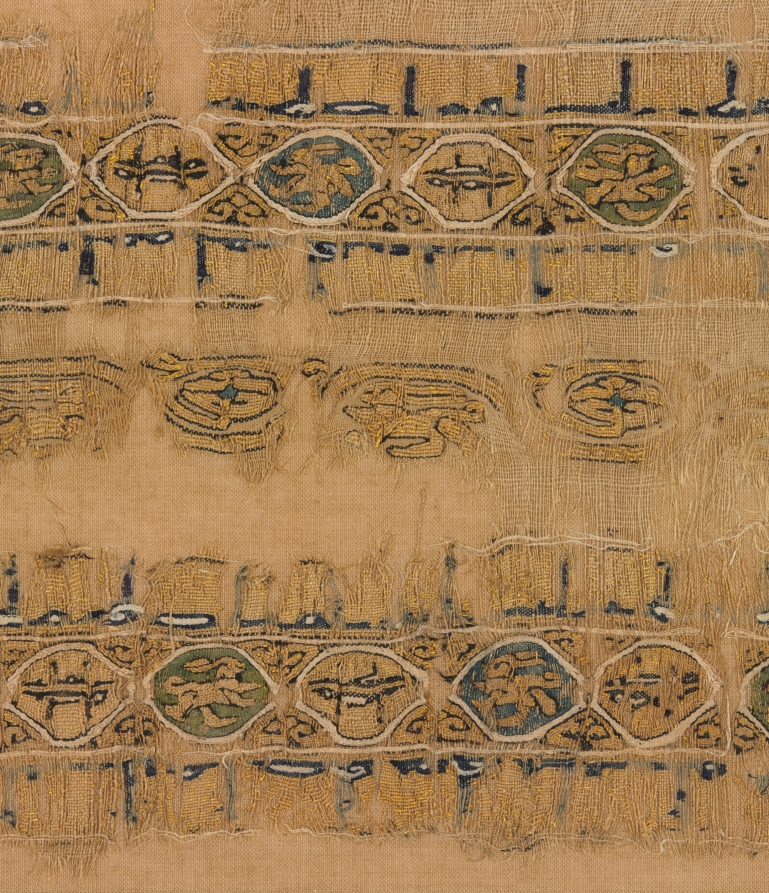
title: Tiraz with gold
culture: Egypt, Fatimid period, reign of Caliph al-Musta‘lī, 1094–1101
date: 1094 – 1101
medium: plain weave with inwoven tapestry weave: linen, silk, and gold filé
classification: Textile